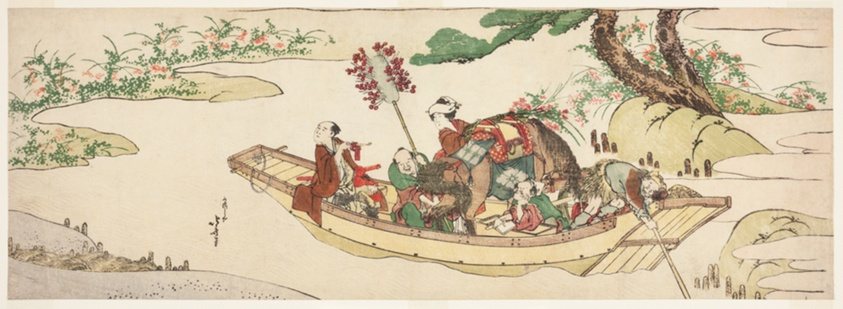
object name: Print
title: Ferry boat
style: Japanese (culture or style)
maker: Katsushika Hokusai 葛飾 北斎; Japanese, 1760-1849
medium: Color woodblock print; nagaban, surimono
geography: Japan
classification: woodblock print; print; asian art